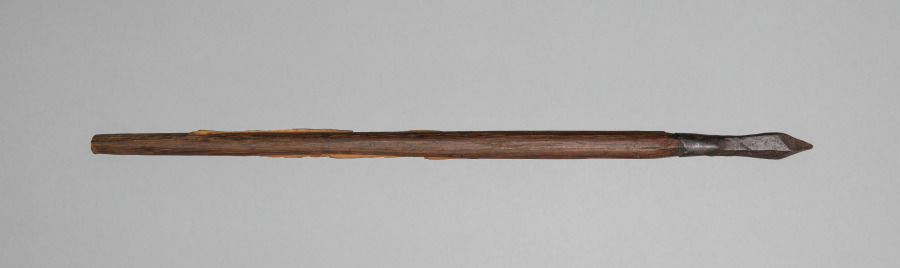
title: Crossbow Bolt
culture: Germany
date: 1500s-1600s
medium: wood, leather, steel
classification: Arms and Armor